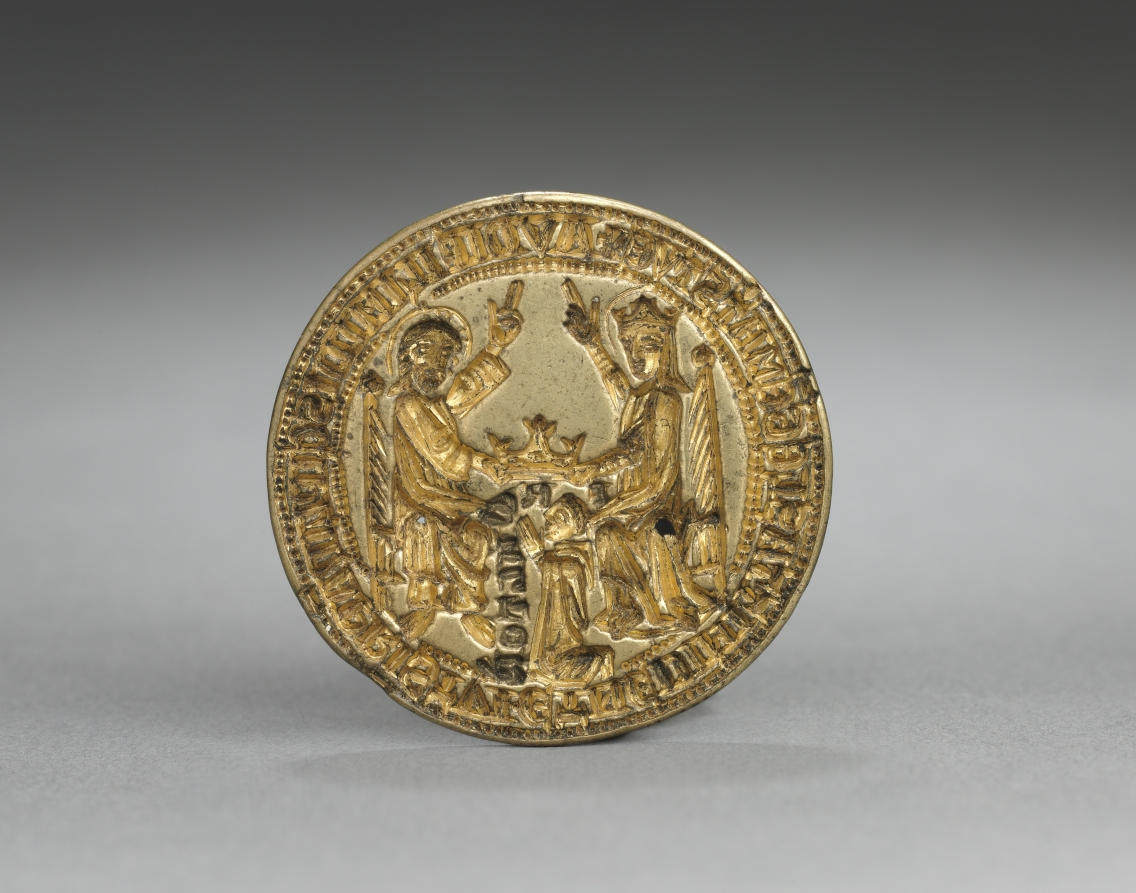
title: Almond-Shaped Seal: Coronation of the Virgin with a Kneeling Monk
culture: England or Germany, Gothic period, 14th century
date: 1300–1400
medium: gilded bronze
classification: Glyptic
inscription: Latin inscription from Proverbs 1:8: AUDI, FILI MI, DISCIPLINAM PATRIS TUI. ET NE DIMITTAS LEGE MATRIS TUI.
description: These seals were once used in monasteries as molds for making wax impressions that were routinely pressed onto letters, charters, and other documents as proof of authenticity.